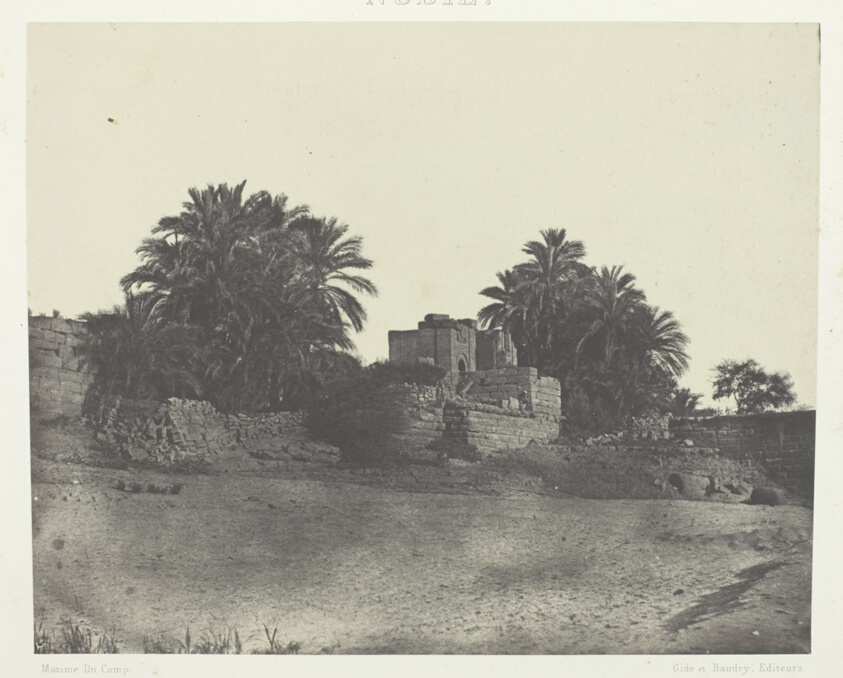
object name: Photograph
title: Ruines d'Une Fortification Romaine, Philoe; Nubie, plate 71 from the album "Egypte, Nubie, Palestine et Syrie" (1852)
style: 19th century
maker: Maxime Du Camp (French, 1822–1894)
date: 1849/51, printed 1852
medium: Salted paper print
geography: France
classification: salted paper print; photographic process; photography; photograph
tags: Collected by Hugh Edwards, Egypte, Nubie, Palestine et Syrie